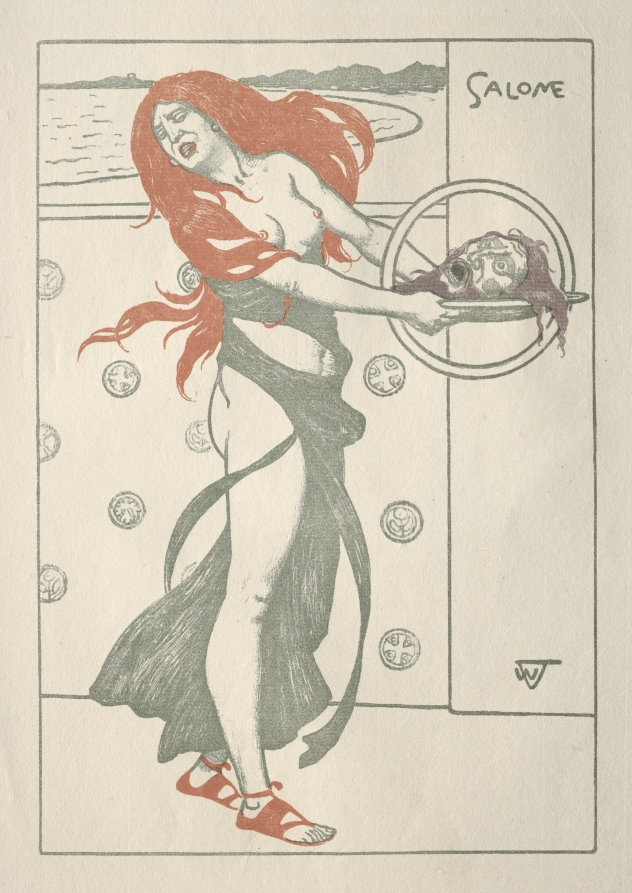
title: Salomé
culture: Germany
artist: Wilhelm Volz (German, 1855–1901)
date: 1896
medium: color woodcut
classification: Print